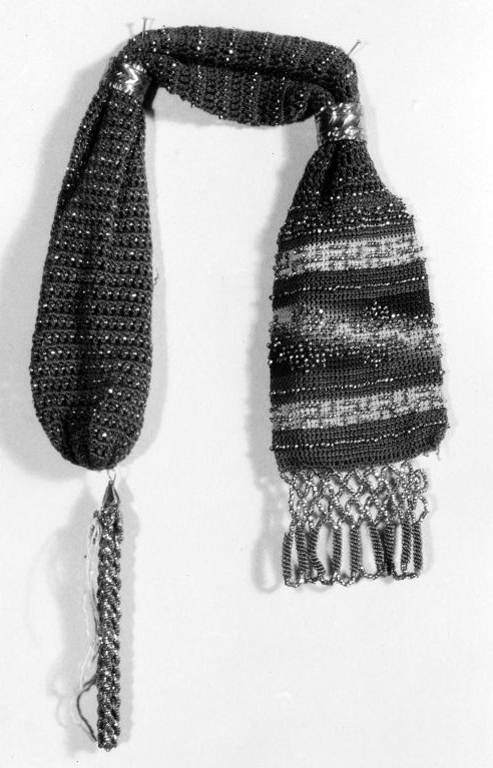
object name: Costume and Accessories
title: Miser Bag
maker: France or England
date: 1801/50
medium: Steel cut beads; silk crochet; steel findings; trimmed with spiraled wire and beads strung and joined in pattern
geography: France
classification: textile; bag - needlework; costume accessory - bag; costume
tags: fashion